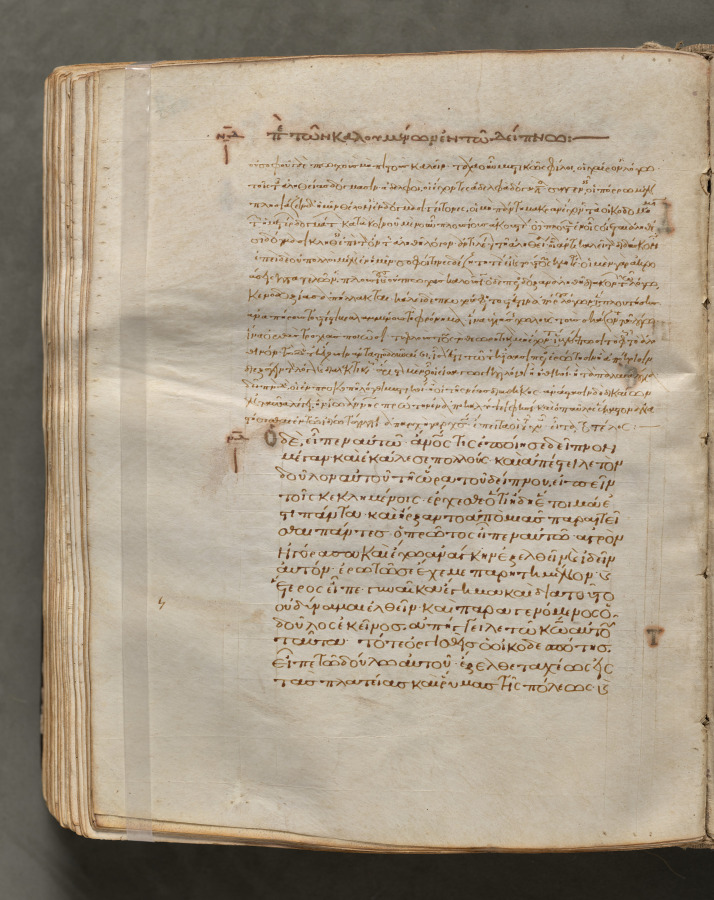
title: Text, folio 277 (verso), from a Gospel Book with Commentaries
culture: Byzantium, Constantinople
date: c. 1000–1100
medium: ink, tempera, and gold on vellum; leather binding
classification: Bound Volume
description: Each of the four gospels in this book opens on a page with brilliantly illuminated borders depicting the author of the text as well as birds—principally peacocks, symbols of the immortality of the soul—and fountains, representing the fountain of life and the salvation of the soul. This volume consists of 428 leaves with texts in Greek. Its level of sophistication suggests that it was probably written and decorated in a monastery in Constantinople.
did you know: Gospel books were carried in procession through Byzantine churches.